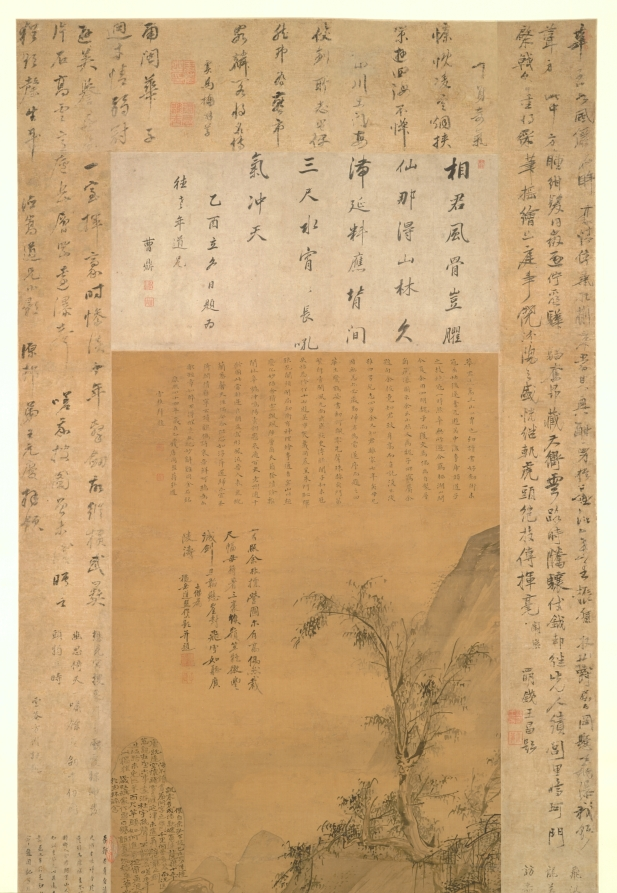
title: Layered Peaks and Splashing Waterfall: Portrait of Hua Yan as a Young Man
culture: China, Qing dynasty (1644-1911)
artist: Hua Yan (Chinese, 1682–c. 1765)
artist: and Wei Shijie (Chinese, 1667–after 1747)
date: 1705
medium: Hanging scroll; ink and color on silk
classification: Painting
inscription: 寫照余非擅，營圖爾自高。/ 偶然裁尺幅，毋待著三豪。/ 護嶺笙疑徹，豐誠劍且韜。/ 懸崖對飛雪，如聼廣陵濤。/ 士傑為秋岳道盟作小影並題。 [印]：魏士傑，子良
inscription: 僕自棄孤，乍設己隨四方。蓬根飄零，竟成浩嘆。 媿窮途於阮籍。十年悔不讀書。羞問字之侯芭。千里何曾負笈。而況匡廬既遠。空懐飛雪之崖。延津未遥，莫辯化龍之劍。 慈親在望，空事遠游。杜宇為聲，不如歸去。嗟乎，半生岐途，未免亡羊。百尺竿頭，如何進歩。 從前孟浪，圖此猖狂。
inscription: Top inscription on the painting by Jiang Hongdao 將弘道, dated yiyou, the forty-fourth year of the Kangxi era (1705)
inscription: Seven additional colophons on the silk mounting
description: This portrait was jointly executed by Wei Shijie and Hua Yan himself who painted the landscape in the background. Hua Yan is shown here at the age of about 23. The sword at his back is a reference to his early desire for a military career, while the scholar’s robe suggests an opposing aspiration. Together these are signs of a complex personality. The painting also reveals Hua Yan’s early talent in painting. While Wei Shijie is little known, Hua Yan would later become a well-known painter. In addition to Wei Shijie and Hua Yan, nine of Hua Yan’s contemporary friends left inscriptions on the painting.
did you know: Hua Yan's autobiographical inscription, full of remorse and insecurity, is squeezed into the contour of a hill in the upper left.